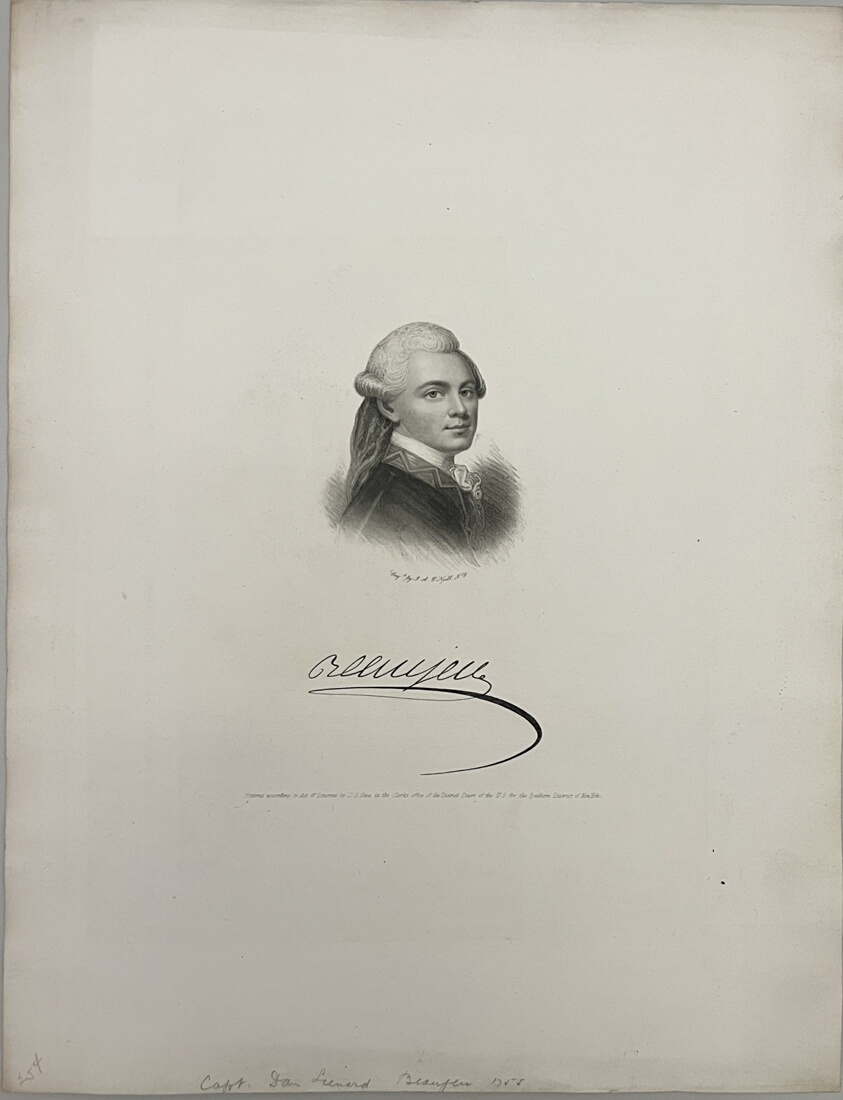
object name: Print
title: Beaujeu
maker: J.A. O'Neill (American, 19th century)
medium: Steel engraving on paper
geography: United States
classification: reproduction; print; prints and drawing